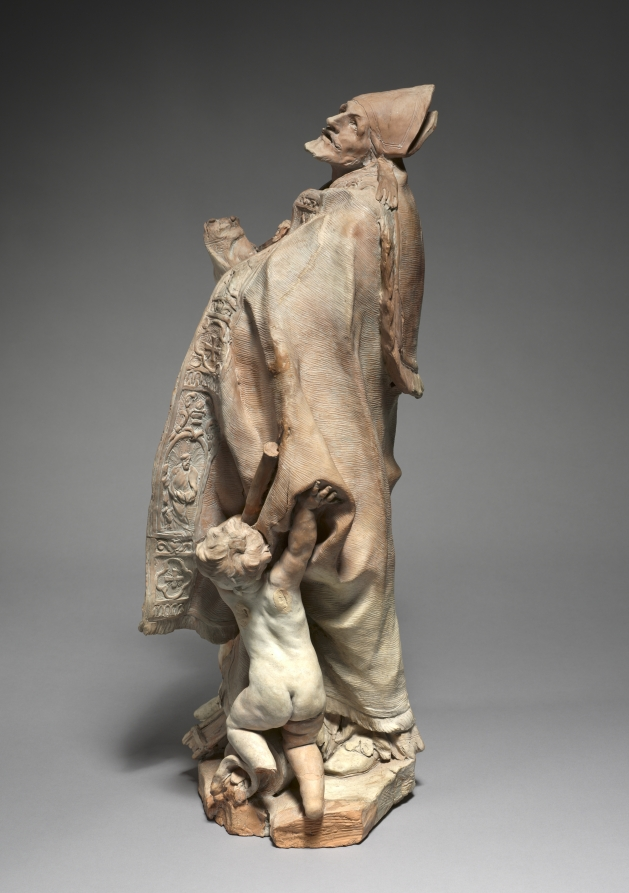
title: Study for The Blessed Alessandro Sauli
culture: France, made in Genoa, 17th century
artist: Pierre Puget (French, 1620–1694)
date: 1663–1668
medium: terracotta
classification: Sculpture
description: A famous preacher from an aristocratic family in Genoa, Sauli (1534-1591) spearheaded important Catholic reforms, including popular missions and restructuring the church to reach a broader spectrum of worshippers. This sculpture is a model for a large statue commissioned by the Sauli family for a Genoese church. Although the open book speaks to Sauli’s work as a reformer, his twisting body and facial expression indicate utter absorption in a deeply personal vision.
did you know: Terracotta models, like this study for a sculpture, are also known as bozzetti or modelli.